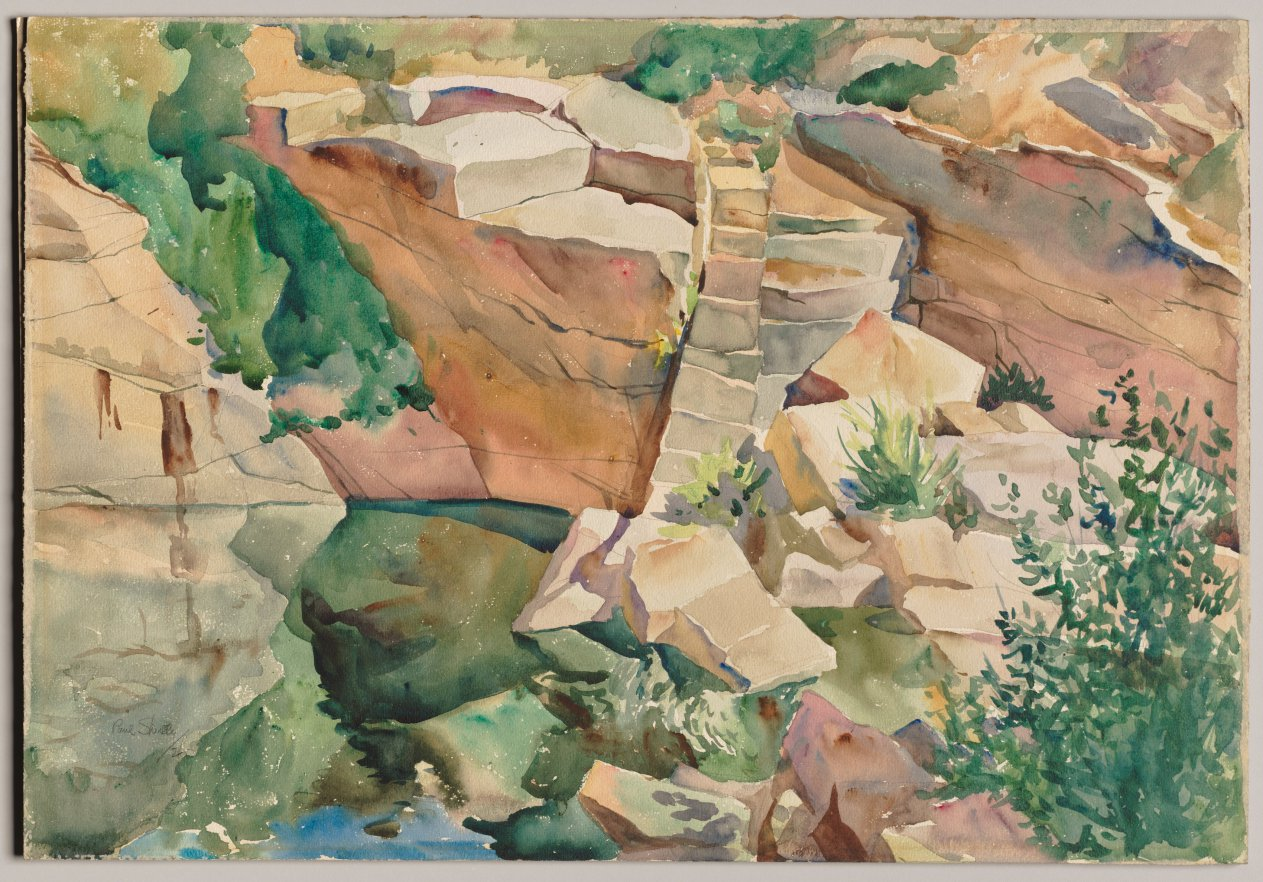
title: Quarry Reflections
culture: America, Ohio, Cleveland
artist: Paul Shively (American, 1897–1987)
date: 1926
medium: watercolor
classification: Drawing